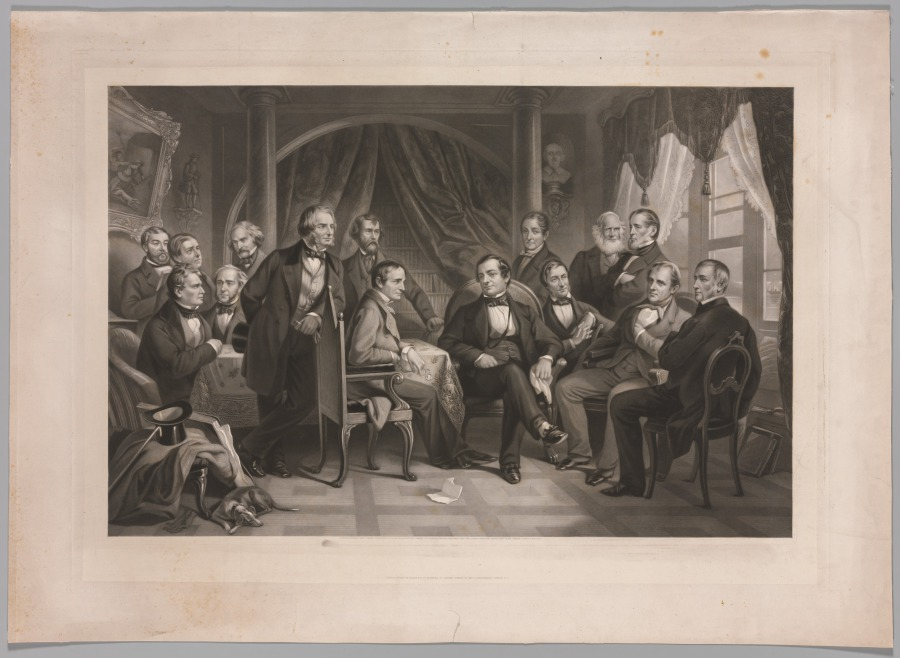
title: Washington Irving and his Literary Friends at Sunnyside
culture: America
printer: Thomas Oldham Barlow (British, 1824–1889)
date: 1864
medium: engraving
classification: Print